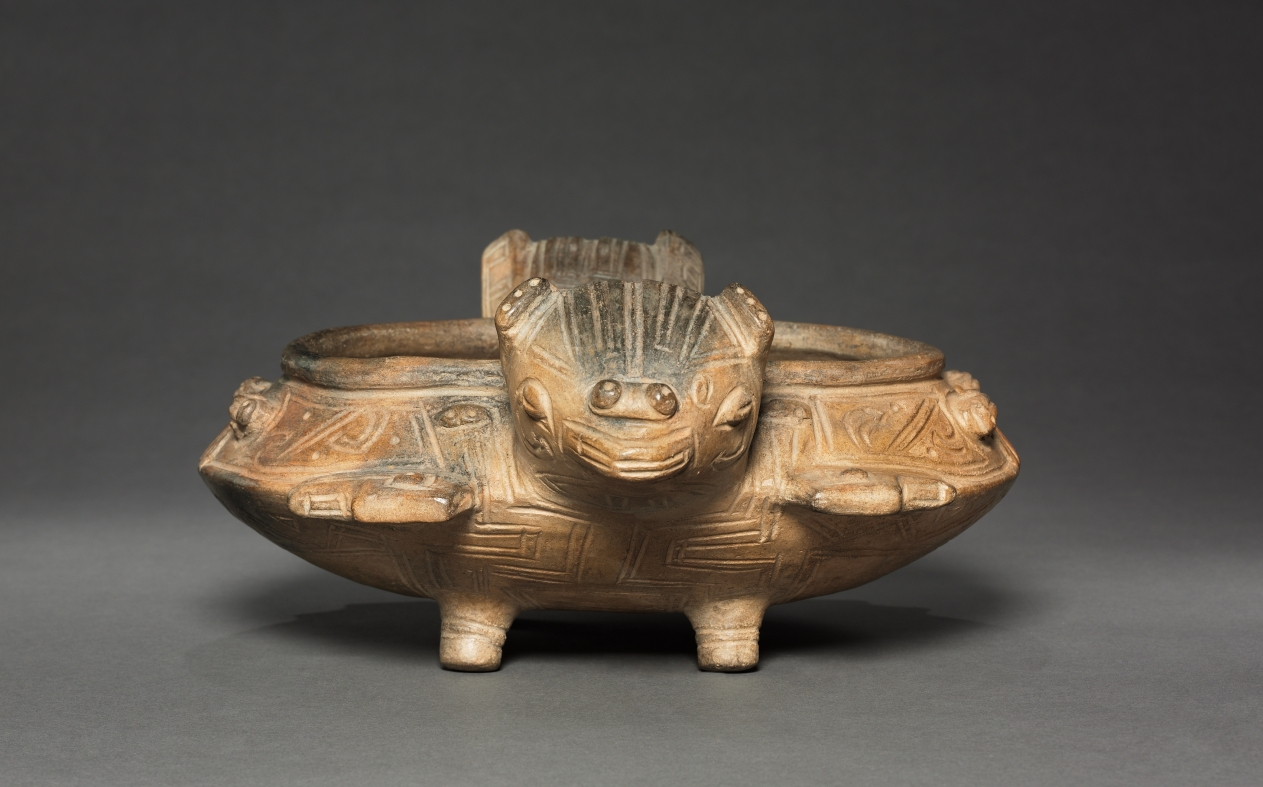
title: Double-Bat Bowl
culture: Colombia, Tairona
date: c. 900–1550 (thermoluminescence date, 810–1310)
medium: earthenware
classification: Ceramic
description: The archaeological Tairona civilization of mountainous northern Colombia is believed to be ancestral to the contemporary Kogi indigenous group. Ancient Tairona sites are terraced, and characterized by circular stone building foundations. The most famous form of Tairona art is gold jewelry, especially lost-wax cast figurines of chiefs, and anthropomorphic bats and birds. Tairona ceramics are less well known. This bowl has two protruding bat heads and four legs. The incurved sides of the bowl to either side of each head represents the bats' wings. The vessel's surface is decorated with raised serpents, as well as incised and impressed patterns.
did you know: The Tairona civilization lived in the mountains of northern Colombia.